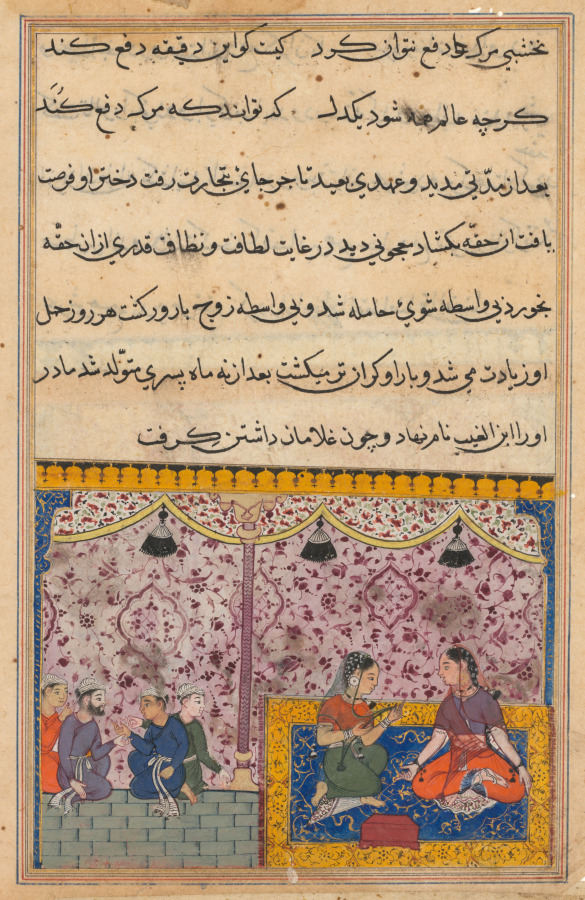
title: The merchant’s daughter gives birth to a son as a result of eating out of the box. The clever child recognizes the false gems from true, from a Tuti-nama (Tales of a Parrot): Twenty-third Night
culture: Mughal India, court of Akbar (reigned 1556–1605)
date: c. 1560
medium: gum tempera, ink, and gold on paper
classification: Painting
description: On the left, a group of merchants argue with a young boy over the veracity of their goods. The boy is a child of fate, miraculously born to a virgin after she ate the remains of a mysterious skull. The box containing the skull sits on the carpet between the virgin and her mother.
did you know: The child is named Ibn al-Ghaib meaning, “the son of an invisible man.”